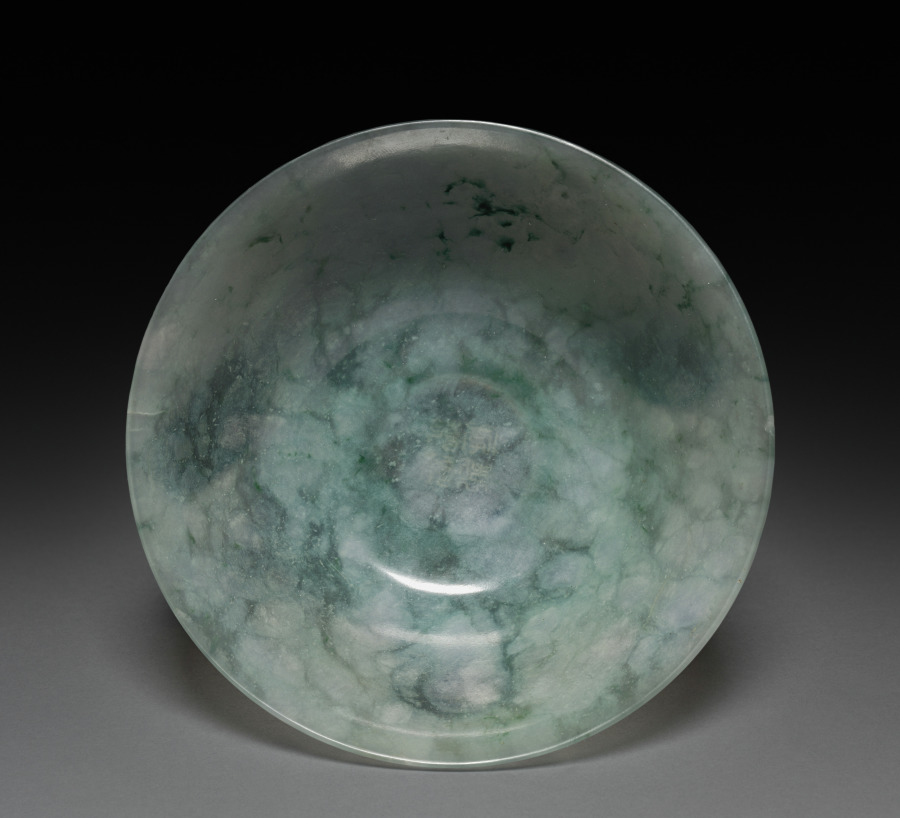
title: Bowl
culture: China, Qing dynasty (1644–1911), Qianlong reign (1736–95)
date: 1736–95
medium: jade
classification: Jade